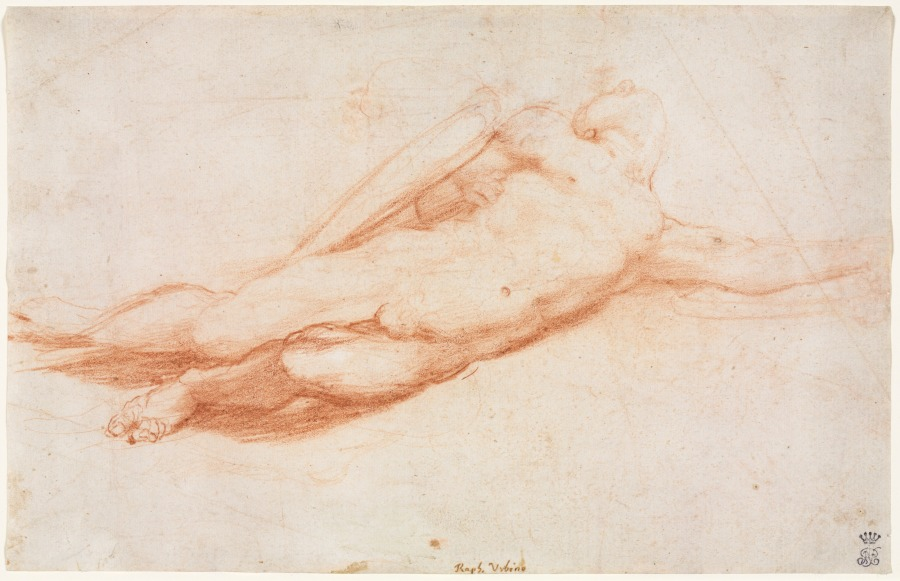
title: Study of a Fallen Soldier (possibly the Conversion of Saul) (recto); A Draped Female Figure (possibly an Amazon) and Architectural Studies (verso)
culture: Northern Italy, Emilia, first half 16th Century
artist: attributed to Correggio (Italian, 1489?-1534)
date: c. 1525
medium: red chalk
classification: Drawing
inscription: recto: in brown ink, lower center: Raph. Urbino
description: In this chalk study of a lone, fallen soldier, the brown ink inscription at the bottom of the sheet indicates that at one time it was believed to be by Raphael. However, it is now attributed to Correggio based on the sensuous drawing style that focuses attention on some details, like the soldier’s leg and foot, while other contours are barely sketched and shaded. The back, or verso, of the sheet presents quick sketches of classical-style architecture and a woman with a quiver of arrows on her back; she may be an Amazon, one of a race of warrior women skilled in archery, or Diana, goddess of the hunt.